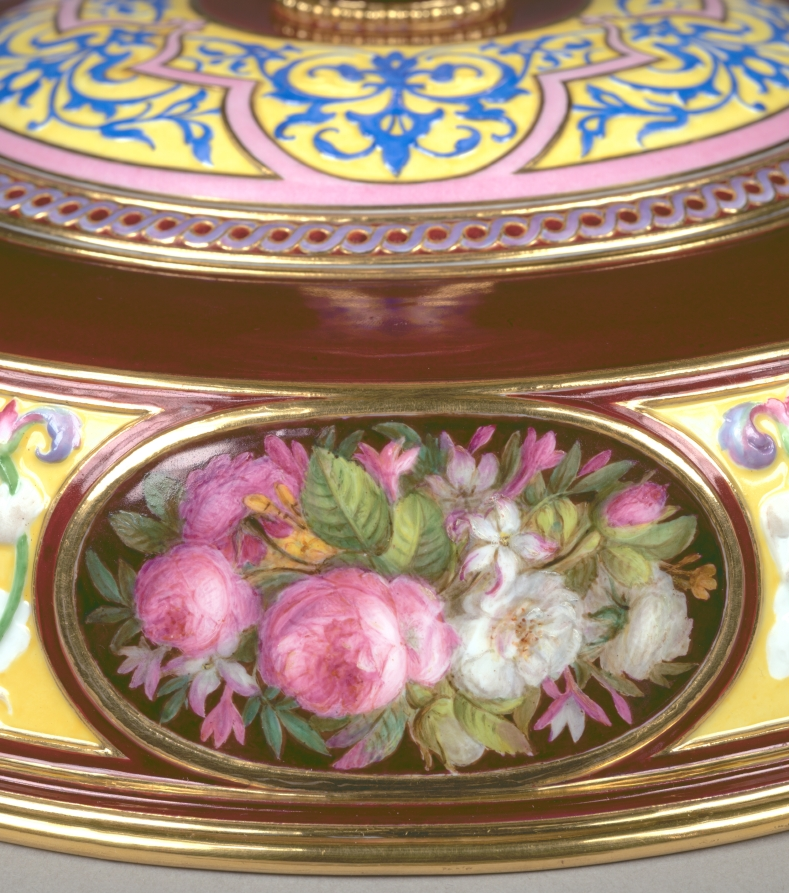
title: Standing Cup and Cover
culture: France, Sèvres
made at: Sèvres Porcelain Factory (French, est. 1756)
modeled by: Hyacinthe-Jean Regnier (French, 1803–1870)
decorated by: Francois-Hubert Barbin (French, 1786-)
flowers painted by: Jacques-Nicolas Sinsson (French)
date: 1844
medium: porcelain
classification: Ceramic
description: The official French porcelain factory at Sèvres has always been one of Europe's most important ceramic manufacturers, famous for its decorative pieces as well as more utilitarian wares. This vase in the Renaissance style, its design inspired by 16th-century French examples, is clearly in the tradition of elaborately conceived and decorated pieces intended for use by the French court or as presentation pieces by its monarchs. The latter was the fate of this Covered Cup, acquired in 1846 by Queen Marie-Amélie d'Orleans, the wife of Louis-Philippe, king during the July Monarchy (1830-48). Soon thereafter the vase was presented to a now unknown person. It is one of four pieces of this design made at the Sèvres factory, and the only one known today to have survived.